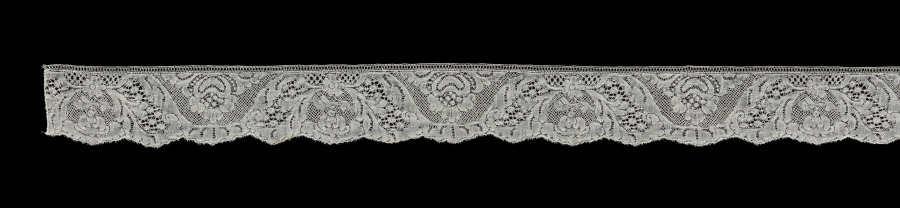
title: Lace Edging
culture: Belgium, Binche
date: 1700s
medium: Linen: bobbin lace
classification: Lace